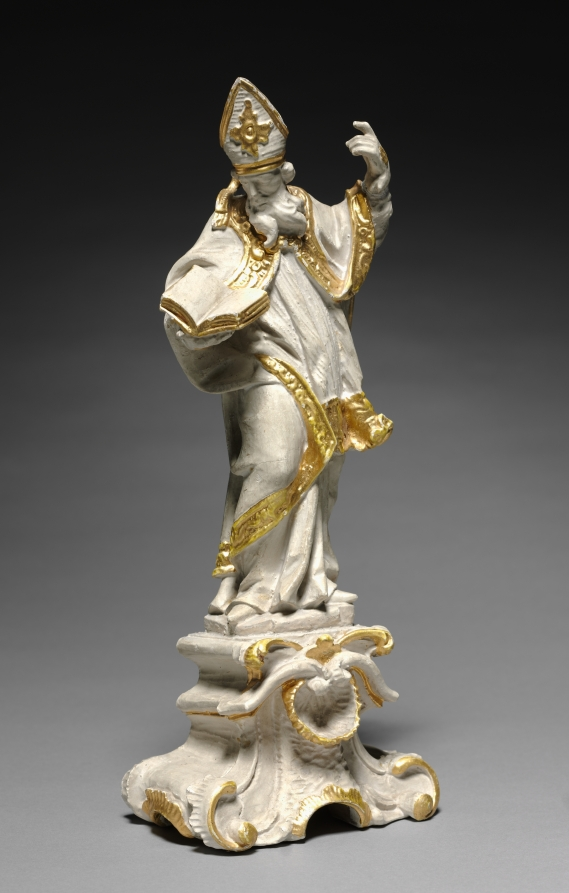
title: Bishop Saint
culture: Germany, 18th century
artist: attributed to Ferdinand Tietz (Austrian, 1708–1777)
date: c. 1740–1750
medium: painted and gilded wood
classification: Sculpture